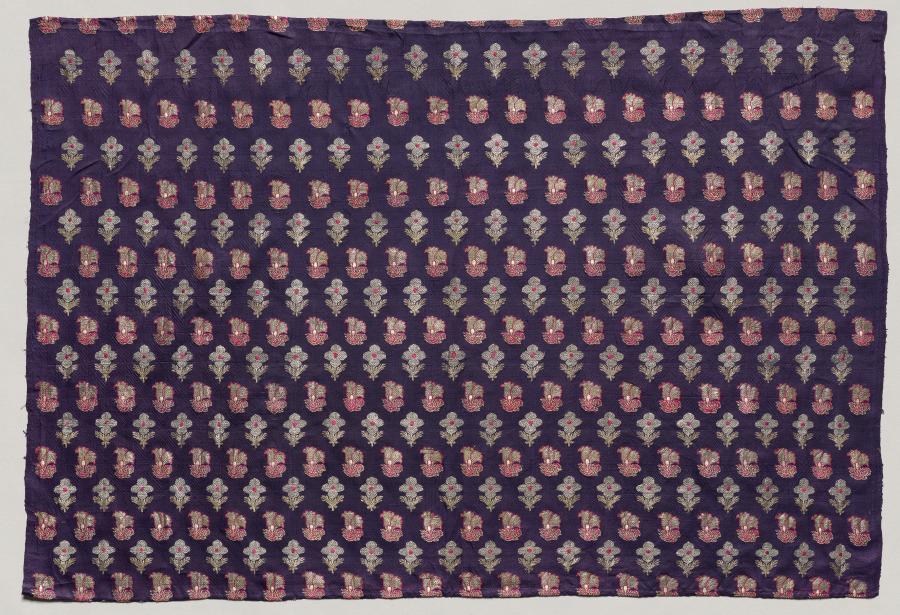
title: Fragment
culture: India, Benares ?, 19th century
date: 1800s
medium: brocade, "kimkhwab"; silk with gold and silver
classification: Textile